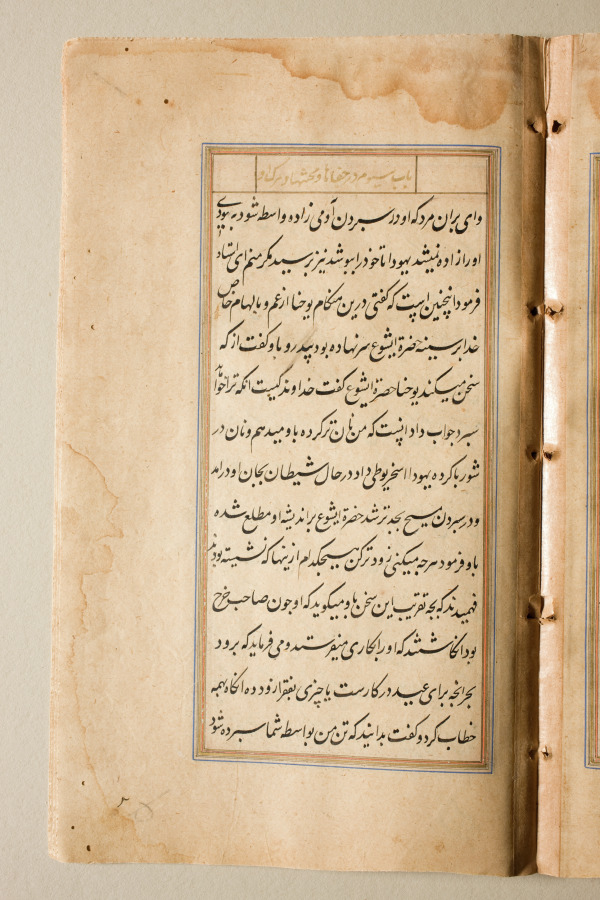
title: Text page from a Mirror of Holiness (Mir’at al-quds) of Father Jerome Xavier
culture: Mughal India, Allahabad, made for Prince Salim (1569–1627)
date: 1602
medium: Ink and gold on paper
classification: Manuscript